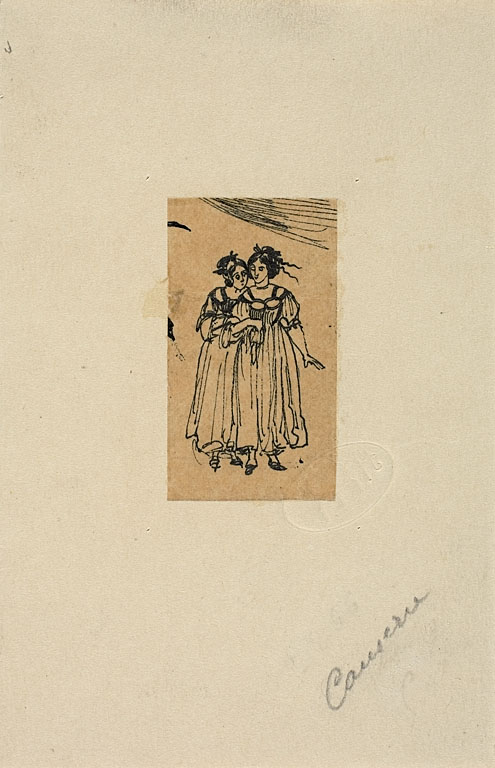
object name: Drawing and Watercolor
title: Conversation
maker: Rodolphe Bresdin (French, 1825-1885)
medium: Pen and black ink, on tan tracing paper, laid down on buff wove paper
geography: France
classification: pen and ink drawings; drawings (visual works); prints and drawing